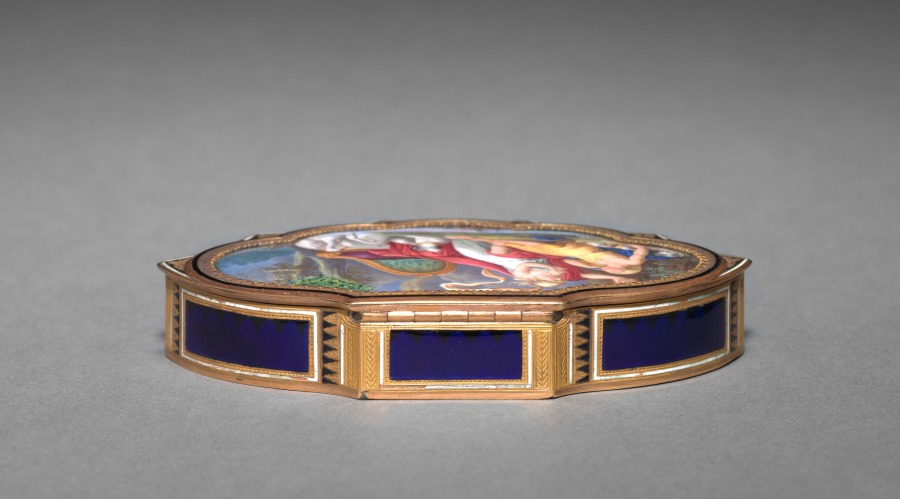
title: Box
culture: Switzerland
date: early 1800s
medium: gold and enamel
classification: Enamel